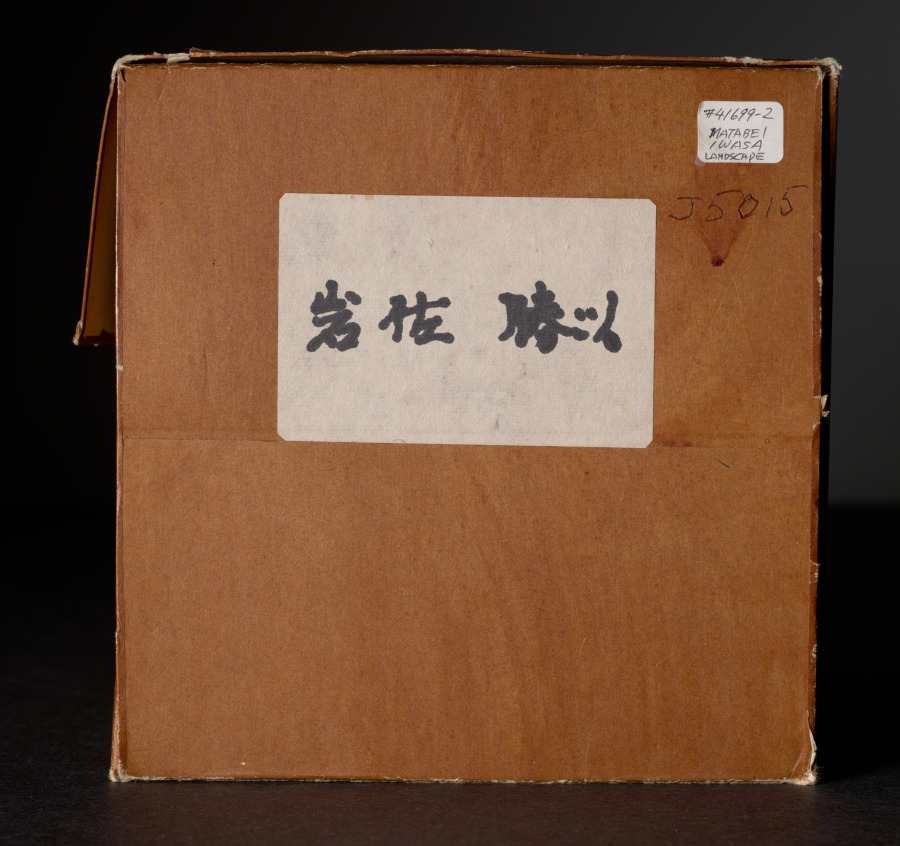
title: Coastal Landscape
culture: Japan, Momoyama period (1573–1615)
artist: Iwasa Matabei (Japanese, 1578–1650)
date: 1573–1615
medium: hanging scroll; ink on paper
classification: Painting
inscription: signed: signature unread